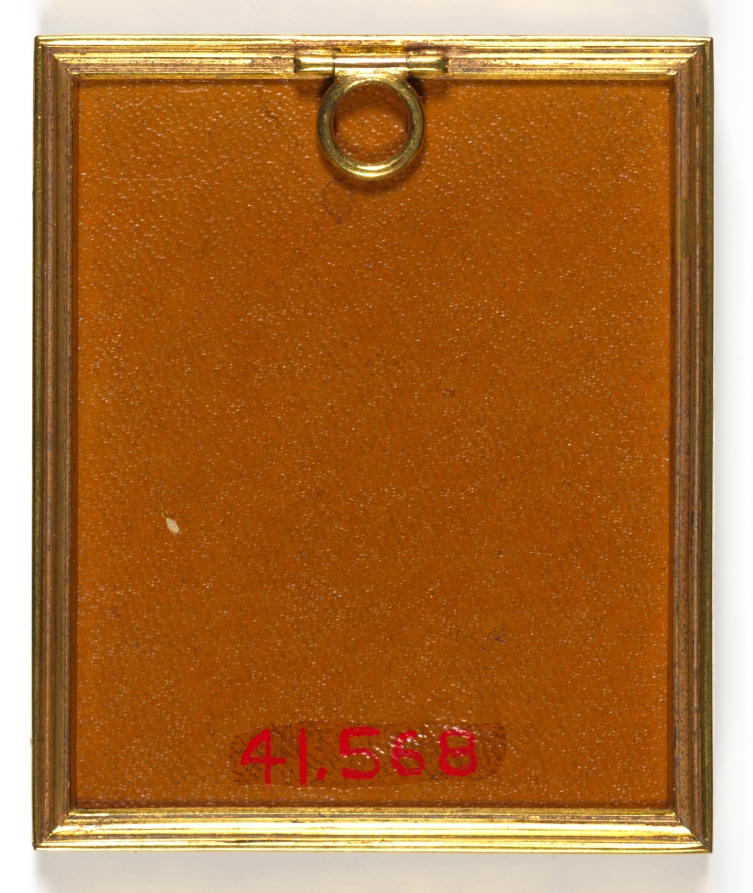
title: Portrait of a Woman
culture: England, 18th century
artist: John I Smart (British, 1741–1811)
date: c. 1775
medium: graphite and wash on laid paper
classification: Portrait Miniature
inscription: inscribed on paper backing in graphite, upside down, at upper right: 139; also on paper backing in graphite on slant at lower right corner: La belle/Gabrielle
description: Although it is impossible to say if it was always part of the artist’s process to execute a preparatory sketch prior to painting each miniature, we do know that John Smart retained many hundreds of these sketches. A group of preparatory sketches—of which this portrait is one—descended through the Smirke family after Smart’s daughter Sarah gave a sketchbook containing preparatory portrait studies to her friend Mary Smirke, sister of the celebrated Victorian architect Sydney Smirke. This book was probably broken up around 1877 when it was divided between Sydney’s daughters Mary Jemmett and Mrs. Lange, whose portions were both sold at auction in 1928. This portrait was assigned the historically colorful but fictitious title of “La Belle Gabrielle” at some point after memory of its true identity had been lost. Giving illustrious titles to portraits of unknown sitters was a popular strategy adopted by dealers during the nineteenth and twentieth centuries, often applied to miniature portraits and, in particular, to Smart’s sketches of women. The inscription on the paper backing is not in Smart’s hand, and when the paper backing was removed in 1993, no inscriptions were discovered on the back of the drawing itself. Only the sitter’s head and neck are drawn, and a low-necked dress is faintly suggested. Her head is turned to the right, and her light-colored hair is dressed high, with flat curls against the back of her head. She has brown eyes, and the color of her lips is extremely faded, though the hint of a ruddy complexion remains. Her sagging jaw line and the lines beneath her eyes suggest that this sitter was painted as a mature woman. The background is unpainted. To this date, the finished ivory for which this preparatory sketch was presumably undertaken has not been discovered.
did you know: Sketches helped John Smart work out the particulars of a portrait before commencing the miniature on ivory; they were useful in the event that a duplicate might later be required.